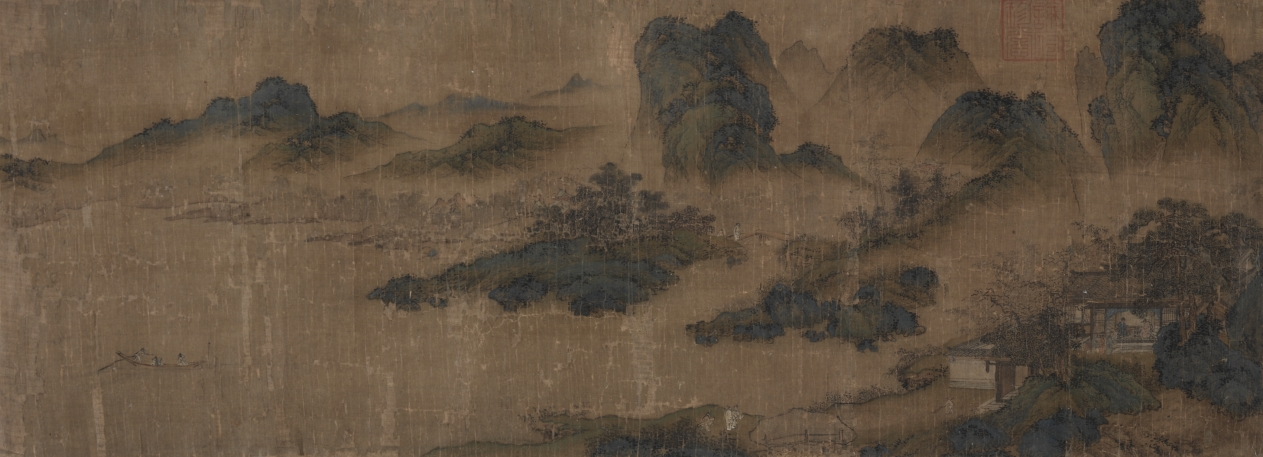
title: Visiting an Old Friend in the Spring Mountains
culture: China, Jaixing, Zhejiang province, Yuan dynasty (1271-1368)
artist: after Sheng Mou (Tzu-chao) (Chinese, active c. 1330–1369)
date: 1300s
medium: Hanging scroll, ink and slight color on silk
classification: Painting